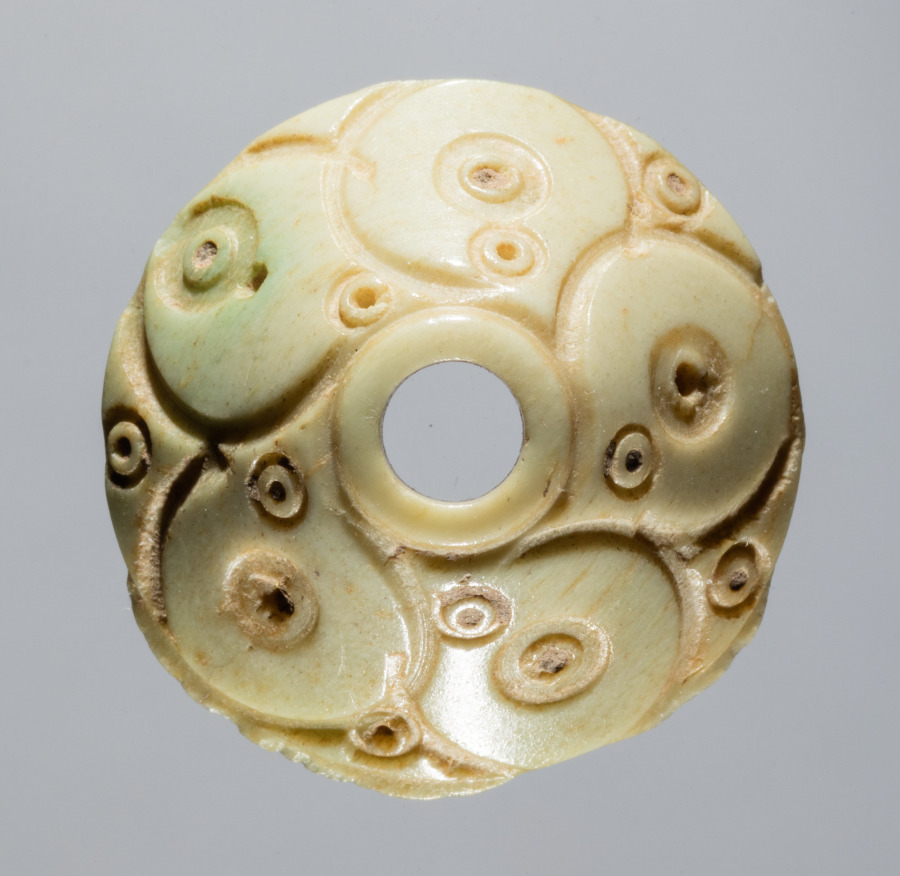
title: Spindle Whorl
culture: Iran, early Islamic period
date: 700s - 900s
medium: bone, incised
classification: Spindle Whorl